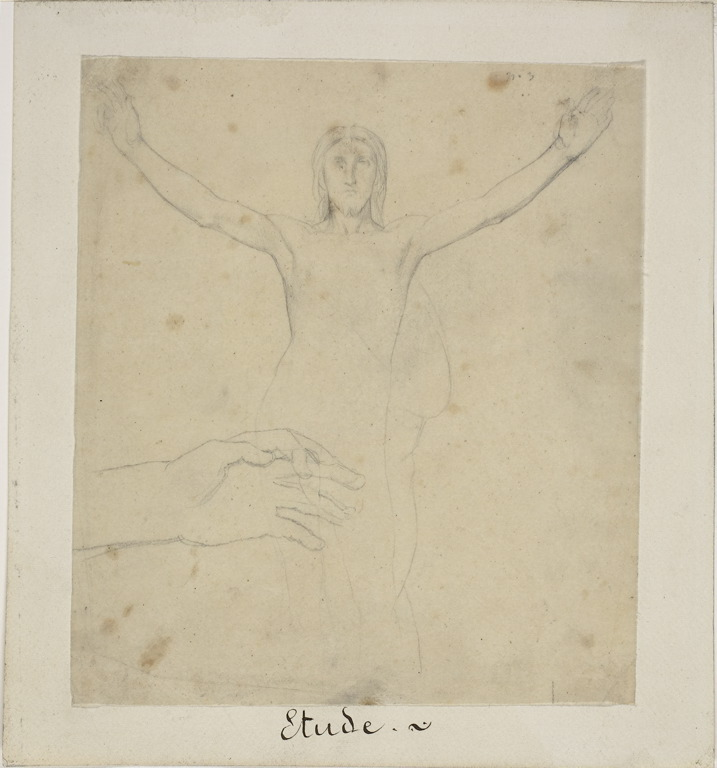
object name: Drawing and Watercolor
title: Study for Resurrection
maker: Jules-Élie Delaunay (French, 1828-1891)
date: c. 1855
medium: Graphite on ivory China paper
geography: France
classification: graphite; drawings (visual works); prints and drawing